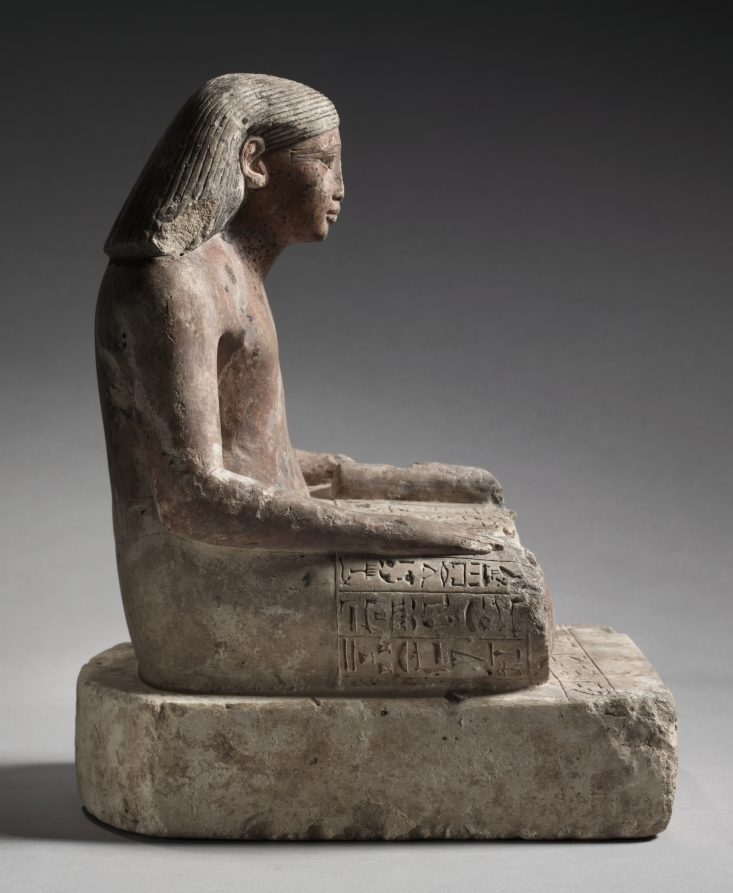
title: Seated Scribe of Medthu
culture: Egypt, New Kingdom (1540–1069 BCE), Dynasty 18, reign of Tuthmosis III (1479–1425 BCE)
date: c. 1479–1425 BCE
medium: limestone, originally painted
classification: Sculpture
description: Medthu, the overseer of the two granaries and scribe of accounts of the fields of Amen, sits cross-legged on the ground in the traditional pose of a scribe. His striated, bell-shaped wig, the stripes of which run parallel to his forehead, completely reveals his ears and passes behind his shoulders. His short, belted kilt is stretched tight to support he papyrus that is partly unrolled across his lap. He holds the rolled-up portion with his left hand, and his right hand rests flat on the papyrus, which curls around his right thigh. The papyrus is inscribed in sunk relief with seven columns of hieroglyphs that face the scribe. The Middle Kingdom type of wig helps date the statue more closely to the earlier part of Dynasty 18, around the time of Tuthmosis III. Later in Dynasty 18 the coiffure was fashionably updated.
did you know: The scribe statue has a long and distinguished history, having first appeared in Dynasty 4 (c. 2613 to 2494 BC).